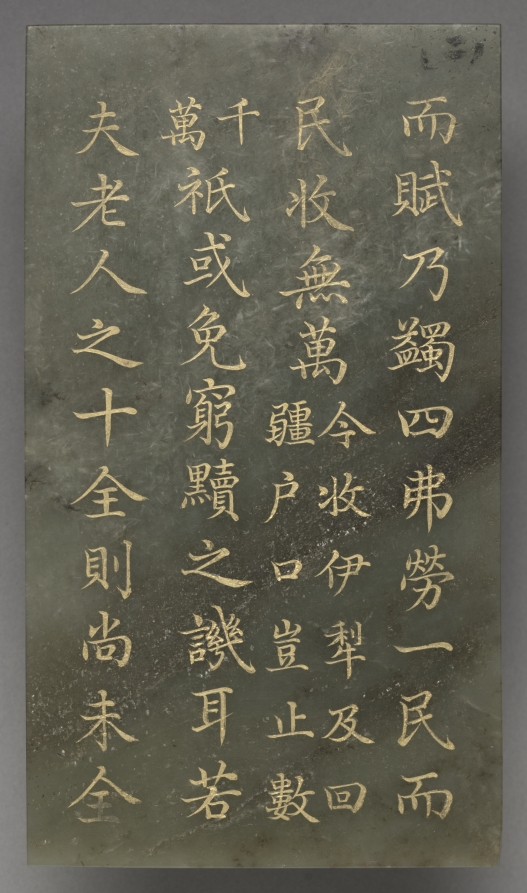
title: Tablet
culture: China, Qing dynasty (1644–1911), Qianlong reign (1736–95)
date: 1778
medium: jade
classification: Jade